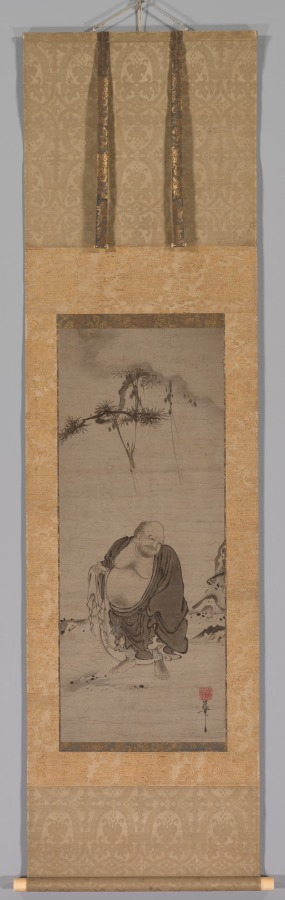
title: Hotei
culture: Japan, Muromachi period (1392–1573)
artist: Kichizan Minchō (Japanese, 1352–1431)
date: late 1300s–early 1400s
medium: hanging scroll; ink and slight color on paper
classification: Painting